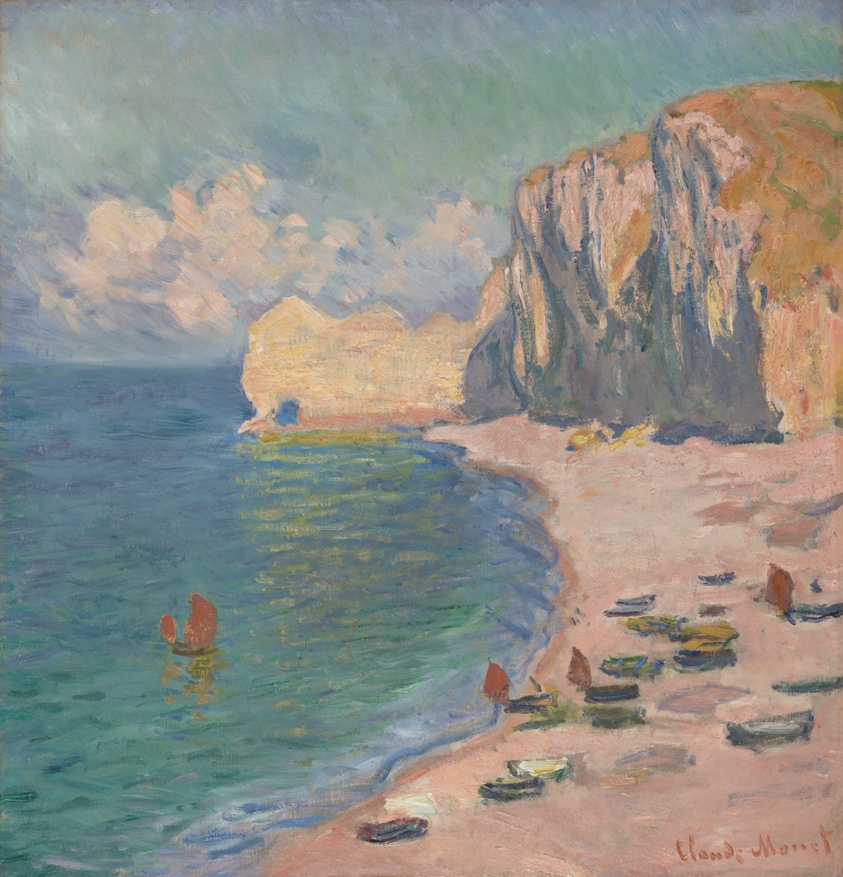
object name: Painting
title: Étretat: The Beach and the Falaise d'Amont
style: Impressionism, nineteenth century, 19th century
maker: Claude Monet (French, 1840–1926)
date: 1885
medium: Oil on canvas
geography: France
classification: painting; paint; oil paintings (visual works); oil on canvas; french; european painting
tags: landscapes, beach, cliff, rocks, boats, sailing, summer, sky, weather/seasons, water